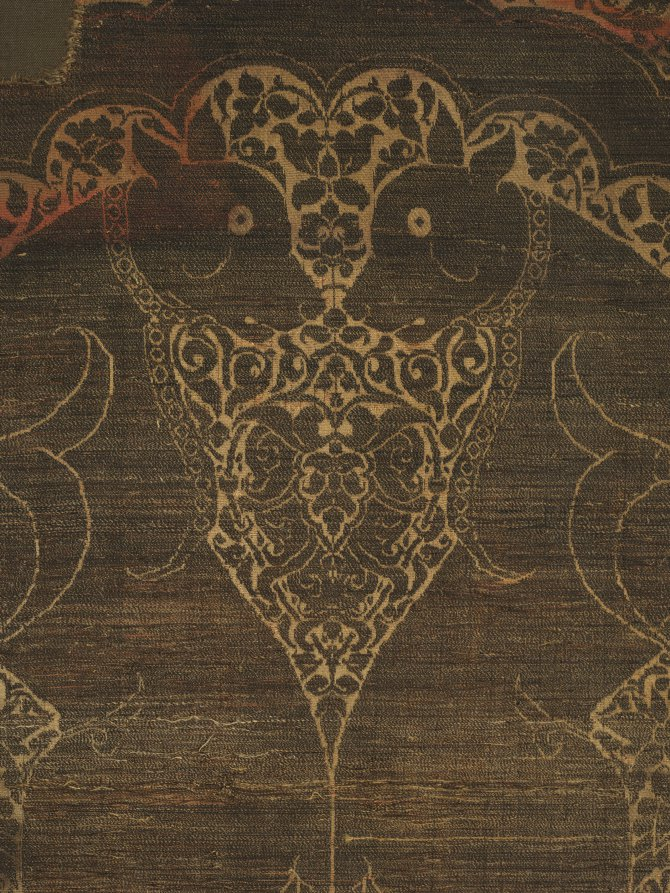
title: Cloth of gold with felines and eagles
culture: Northeast Iran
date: 1225–75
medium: Silk and gold thread: lampas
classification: Textile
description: Mongol taste for luxury was equated with gold, symbol of imperial authority, power, and legitimacy. This splendid cloth of gold-exceptionally large and luxurious-may have enriched the interior of a palace or a majestic tent. The golden pattern, although tarnished on the faded red silk ground, features scalloped medallions with felines whose long tails terminate in dragons’ heads amid elegant floral vines. Double-headed eagles form interstitial motifs on the floral ground. A radiant gold-on-gold band of pseudo-Arabic script enriches the top, woven with gold strips wrapped around a silk core on a ground of flat strips of gold, immediately beneath the pattern testing area.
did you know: Mongol cloths of gold, called nasji, incorporate Iranian, Central Asian, and Chinese features, reflecting the effects of gift exchanges and international commerce.